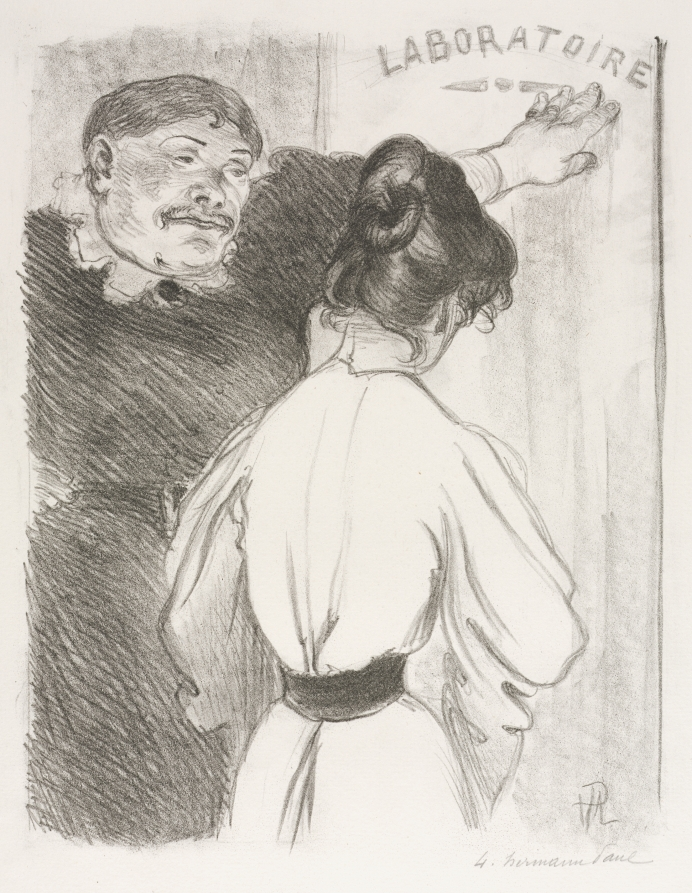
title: Laboratoire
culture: France, 19th century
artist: Hermann Paul (French, 1864–1940)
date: c. 1900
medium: lithograph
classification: Print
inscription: lower margin, in pencil: "4. hermann Paul"